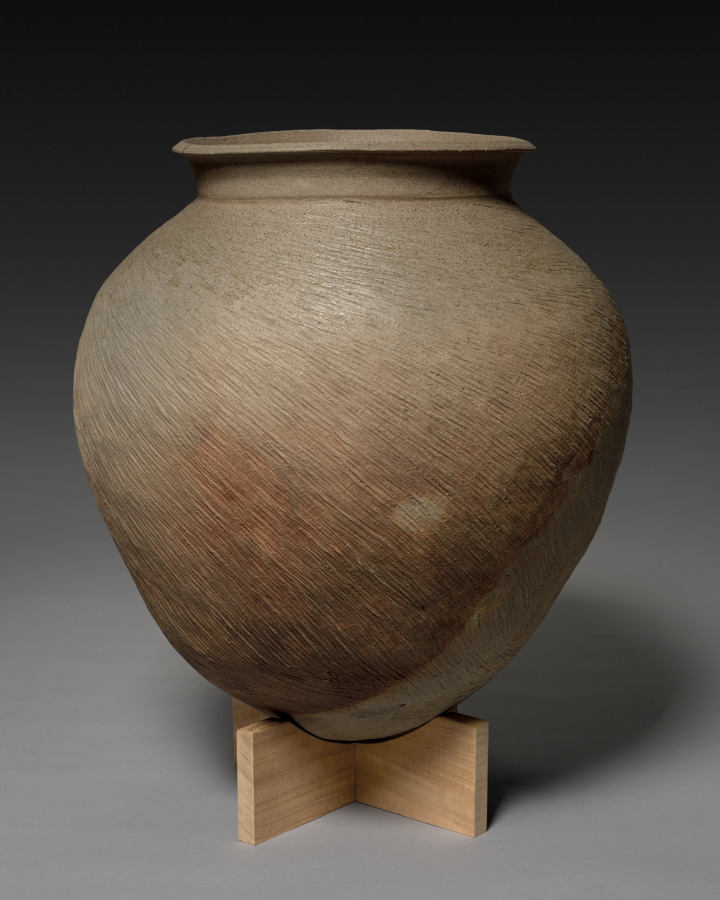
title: Wide-Mouth Jar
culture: Japan, Kamakura period (1185–1333) to Muromachi period (1392–1573)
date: 1300s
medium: Stoneware with impressed and incised decoration (Suzu ware)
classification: Ceramic